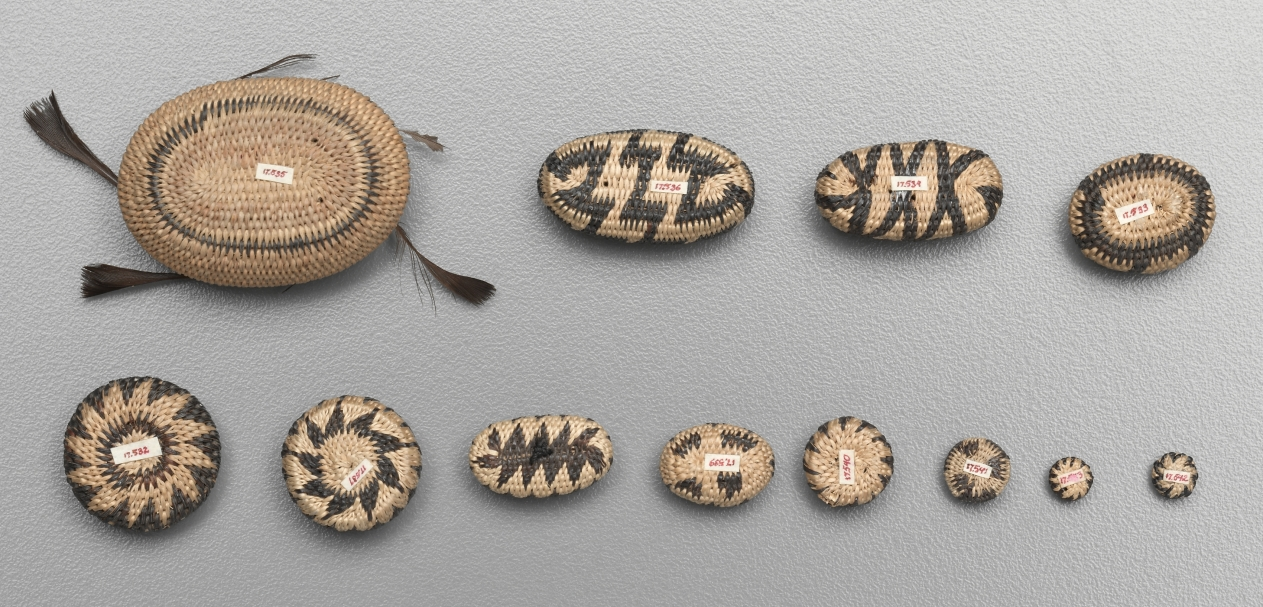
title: Miniature Round Basket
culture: California, Pomo, late 19th-early 20th century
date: late 1800s-early 1900s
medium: plant materials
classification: Basketry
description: Miniature baskets were made to demonstrate the basket-maker’s virtuoso skill, and these tiny marvels seem to be no exception—the smallest are only five millimeters wide but still patterned. For such fine work, dexterity was required as much for preparation of materials as for weaving.